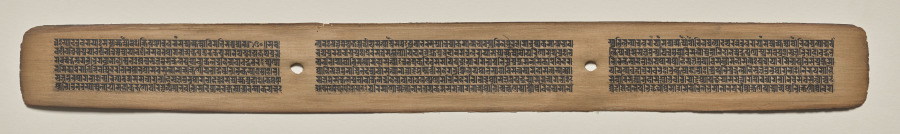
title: Text, Folio 142 (recto), from a Manuscript of the Perfection of Wisdom in Eight Thousand Lines (Ashtasahasrika Prajnaparamita-sutra)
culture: Eastern India, Bihar, Vikramashila Monastery. Painting: Nepal, Kathmandu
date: Sunday, September 14, 1119 (year 239 of the Newar Samvat in the month of Ashvina)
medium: gum tempera and ink on palm leaves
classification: Painting